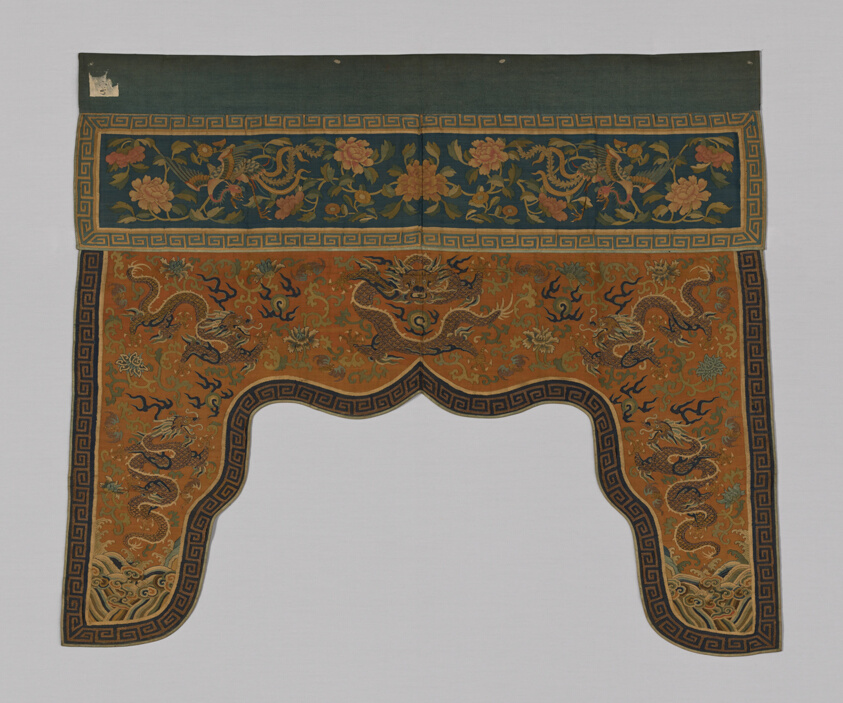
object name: Textile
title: Valance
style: qing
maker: China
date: Qing dynasty (1644–1911), 1775/1800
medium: Tapestry weave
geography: China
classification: textile; weaving